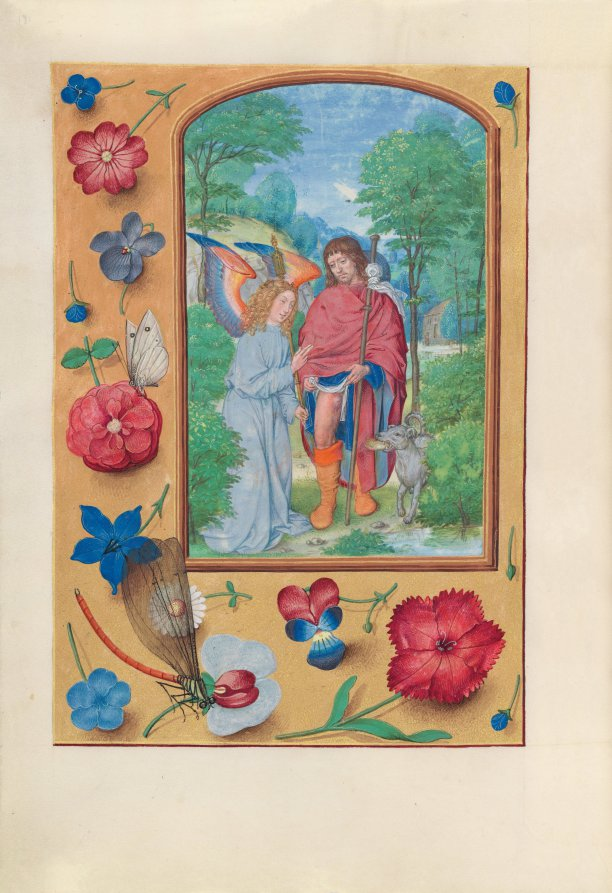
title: Hours of Queen Isabella the Catholic, Queen of Spain: Fol. 181v, St. Roch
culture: Flanders, Ghent and Bruges, late 15th century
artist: Master of the First Prayerbook of Maximillian (Flemish, c. 1444–1519)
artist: and Associates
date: c. 1500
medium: ink, tempera, and gold on vellum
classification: Bound Volume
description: This manuscript was illuminated by a circle of at least five highly organized manuscript painters active in the Flemish cities of Ghent and Bruges. The principal illuminator was Alexander Bening, who painted the majority of the book's miniatures. Manuscripts produced by this circle of artists are renowned for the decoration of their borders, which typically feature a rich variety of realistically-painted flowers, birds, and butterflies. This prayer book, called a book of hours, was intended not for a cleric, but for the private devotions of a lay person-in this case, Isabella the Catholic, Queen of Spain (1451-1504). Isabella's coat of arms embellishes the book's frontispiece. It is unlikely that the book was commissioned by the Queen herself; rather, she probably received it as a diplomatic gift from someone courting her patronage, perhaps Cardinal Francisco Jimenez de Cisneros. A Franciscan friar, Jimenez was dependent upon Isabella for his advancement, first to the post of Queen's confessor in 1492, and then to Archbishop of Toledo in 1495.